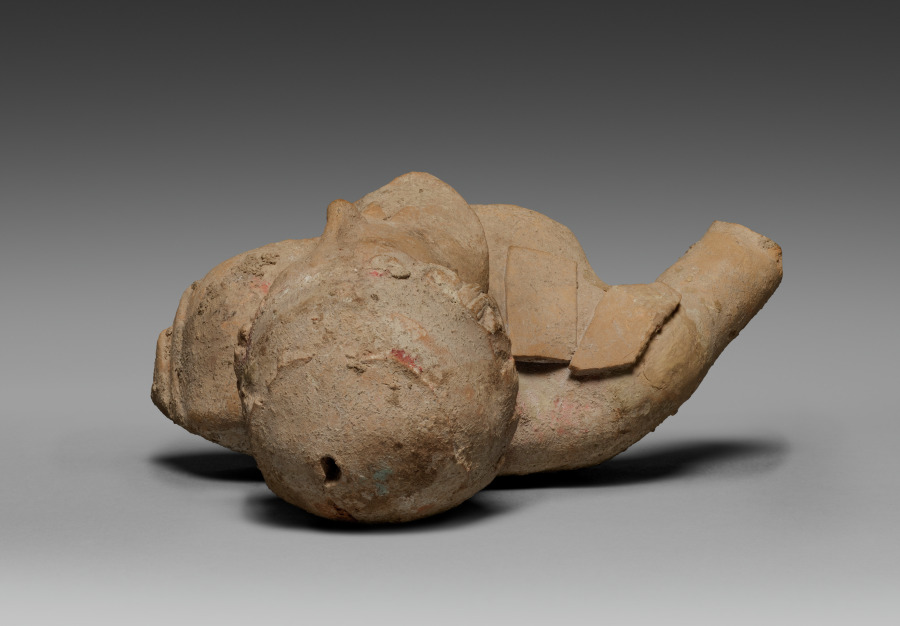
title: Fragment of a Reclining Male Figure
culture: Greek/South Italian, Taranto (ancient Taras)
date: 450–350 BCE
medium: terracotta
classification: Sculpture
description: This terracotta figure depicts a bearded man with his head tilted toward his left shoulder, suggesting that he is reclining. At Greek banquets, the attendees reclined while eating. Banquet imagery was very popular, including in the Greek colonies in Italy. This man likely originally had an elaborate headdress separately made and attached over the smooth part of the head. The clay on the figure’s right shoulder is probably the remains of “ribbons” attached to his headdress. There are traces of red pigment in the hair.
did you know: Tarantine terracotta banqueters were made from molds, with additional handmade details.